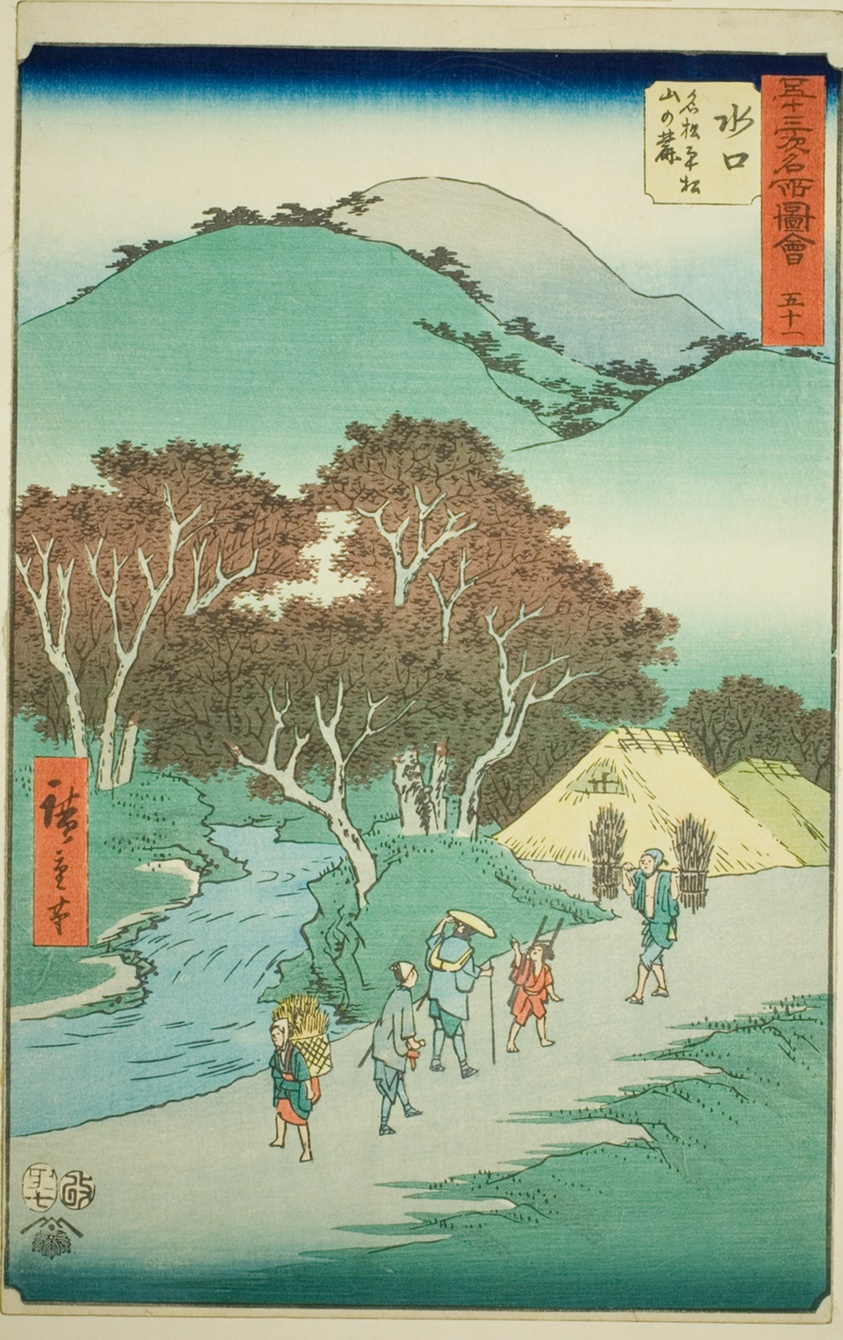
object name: Print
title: Minakuchi: The Famous Pines at the Foot of Mount Hiramatsu (Minakuchi, meisho Hiramatsu yama no fumoto), no. 51 from the series "Famous Sights of the Fifty-three Stations (Gojusan tsugi meisho zue)," also known as the Vertical Tokaido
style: Japanese (culture or style)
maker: Utagawa Hiroshige 歌川 広重; Japanese, 1797-1858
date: 1855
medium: Color woodblock print; oban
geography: Japan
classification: woodblock print; print; asian art